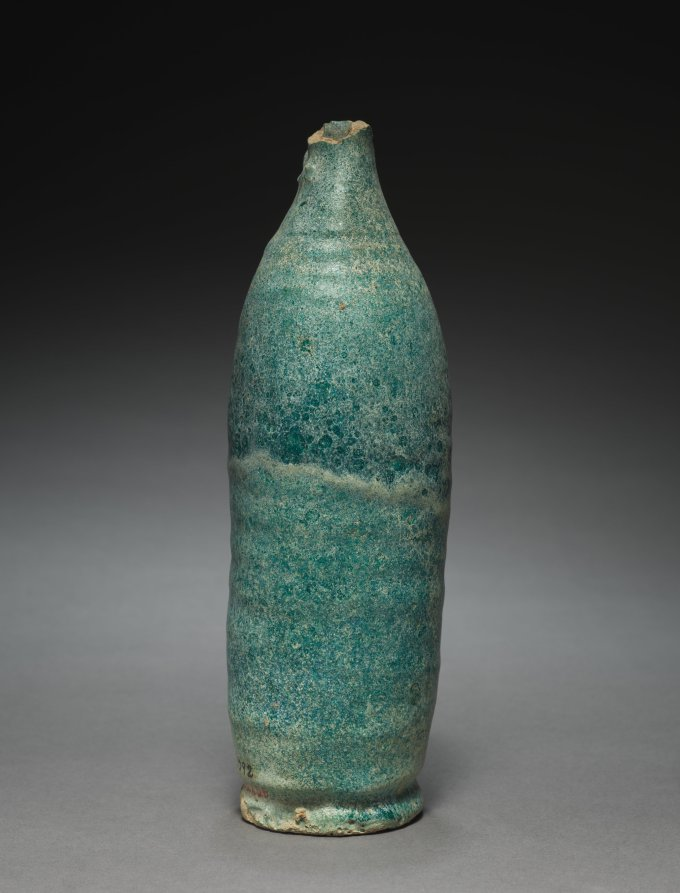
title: Vase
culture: Parthian Empire (247 BCE–224 CE)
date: 1–200 CE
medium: terracotta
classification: Ceramic